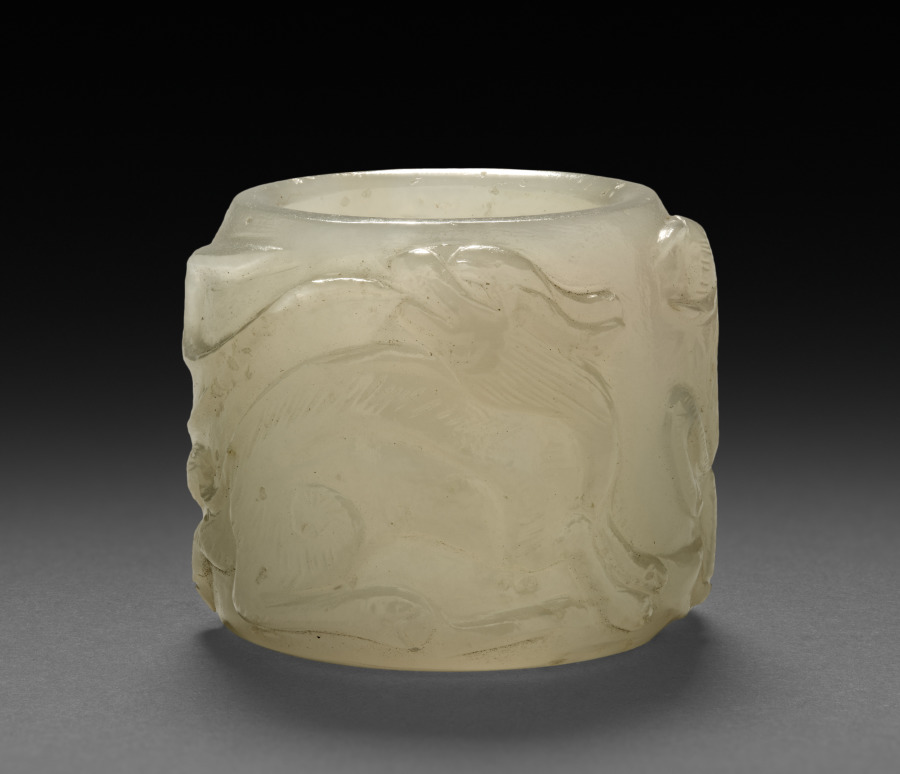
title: Thumb Ring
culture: China, Qing dynasty (1644-1911) or Republican period (1912-49)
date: 1800s–mid-1900s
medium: white jade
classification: Jewelry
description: Jade rings were worn by men on the thumb of the right hand to assist with holding and pulling the string of the archer’s bow. However, thumb rings were also fashionable accessories for civil officials in the late Qing dynasty.